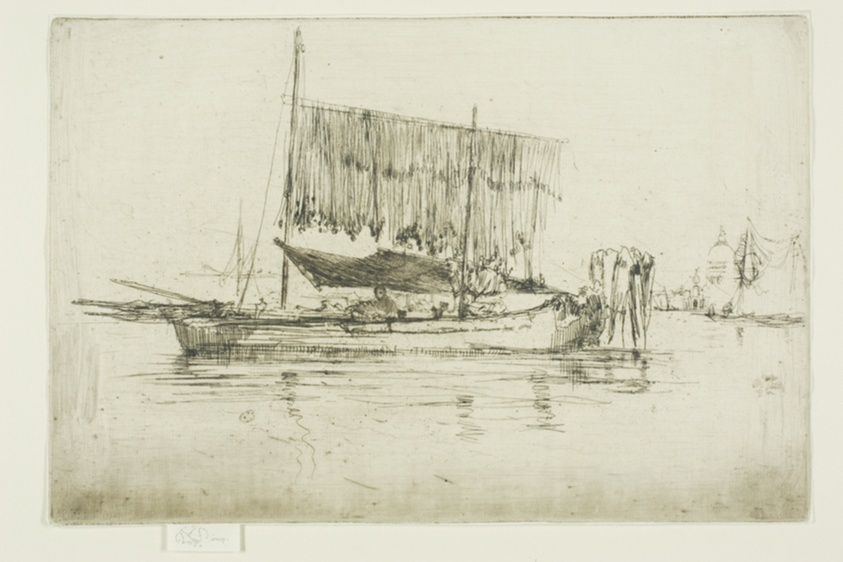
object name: Print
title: The Fishing Boat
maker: James McNeill Whistler (American, 1834-1903)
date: 1879/80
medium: Etching and drypoint with foul biting in black ink on off-white laid paper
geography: United States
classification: etching; foul biting; print; prints and drawing; drypoint; paper